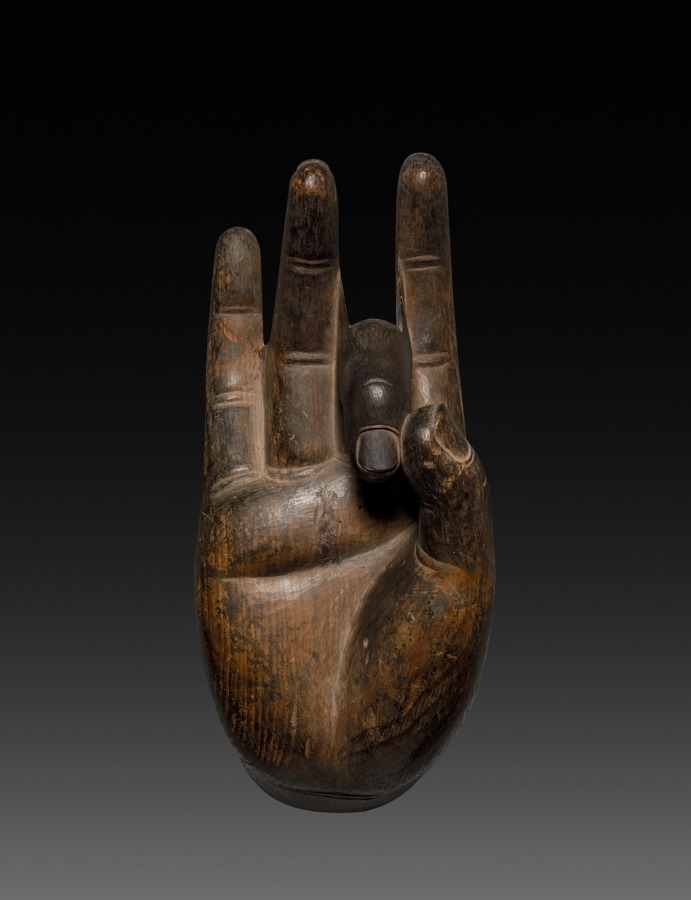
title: Hand of Buddha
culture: Japan, Nara period (710–94)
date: late 700s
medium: wood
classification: Sculpture